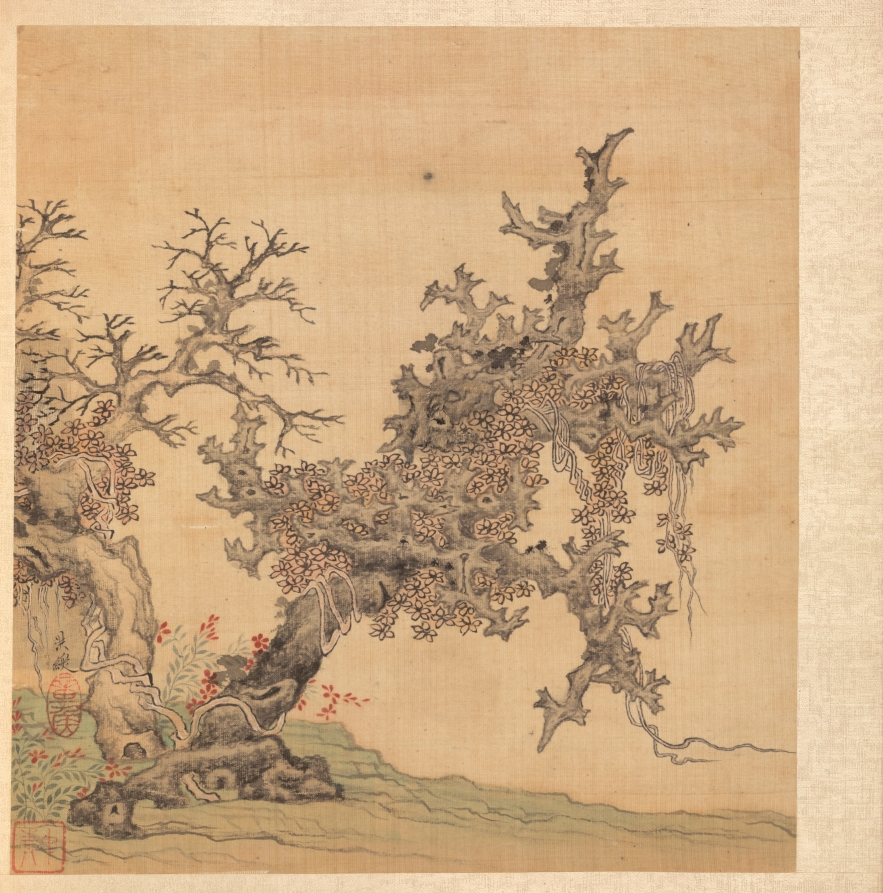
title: Paintings after Ancient Masters: An Ancient Tree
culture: China, Ming dynasty (1368–1644)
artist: Chen Hongshou (Chinese, 1598/99–1652)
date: 1598–1652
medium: album leaf, ink and color on silk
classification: Painting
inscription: Hongshou [seal] Chang-hou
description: The twenty paintings in this double-album by Chen Hongshou include landscapes, figures, and flowers. It also has one leaf featuring a woman, an often-used subject not found in the other albums from the latter part of his career. His late works are wonderful summations of Chen's peculiar and quirky art--archaistic, hyper-refined--but without accompanying shallowness or sentimentality. His figures and landscapes in the late albums are miniaturized, not unlike the small Chinese gardens, or the carefully selected small table rocks or old roots used for contemplation to see the world in miniature. This loss of scale is quite deliberate and reflects the psychological situation of a depressed class like the Ming loyalist officials and scholars, deprived of their integrity and honor, and forced to lead a diminished and restricted existence.